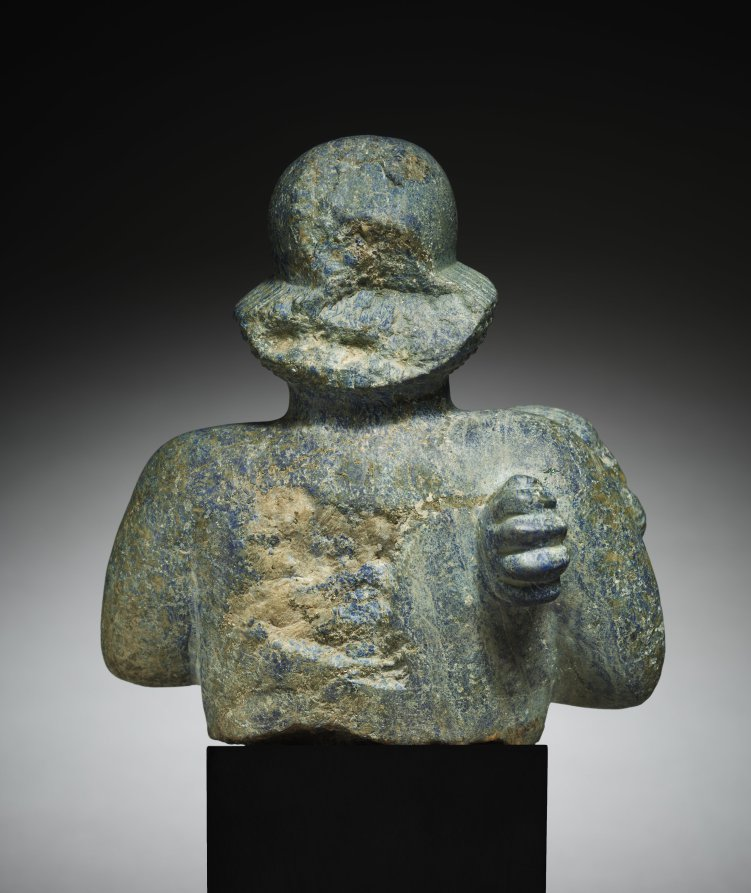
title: Median Lion Strangler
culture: Iran, Achaemenid (550–330 BCE)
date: 500–450 BCE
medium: lapis lazuli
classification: Sculpture